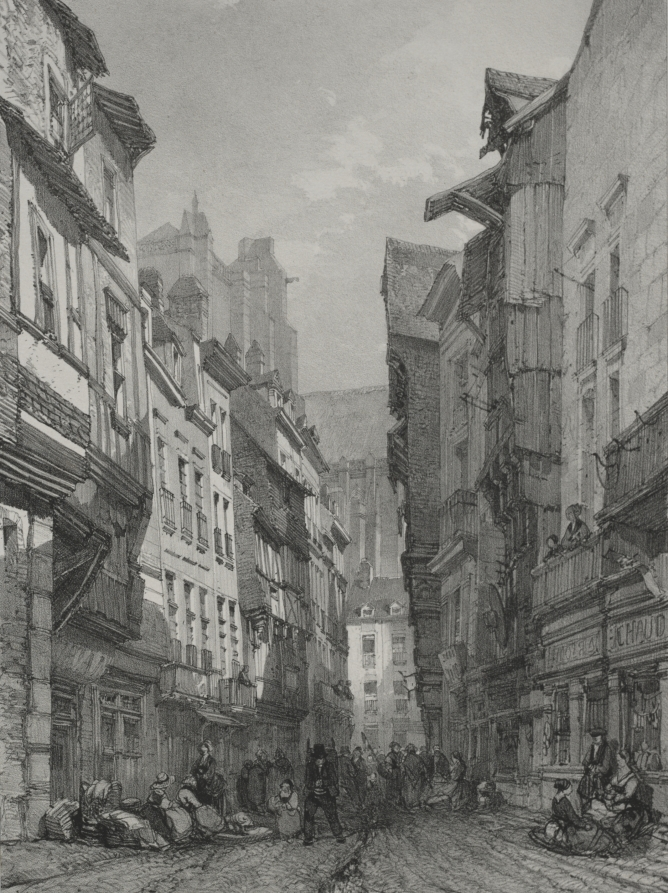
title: Voyages pittoresques et romantiques dans l'ancienne France. Bretagne: Grande rue vieille à Nantes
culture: France, 19th century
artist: Eugène Cicéri (French, 1813–1890)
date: c. 1845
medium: lithograph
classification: Print